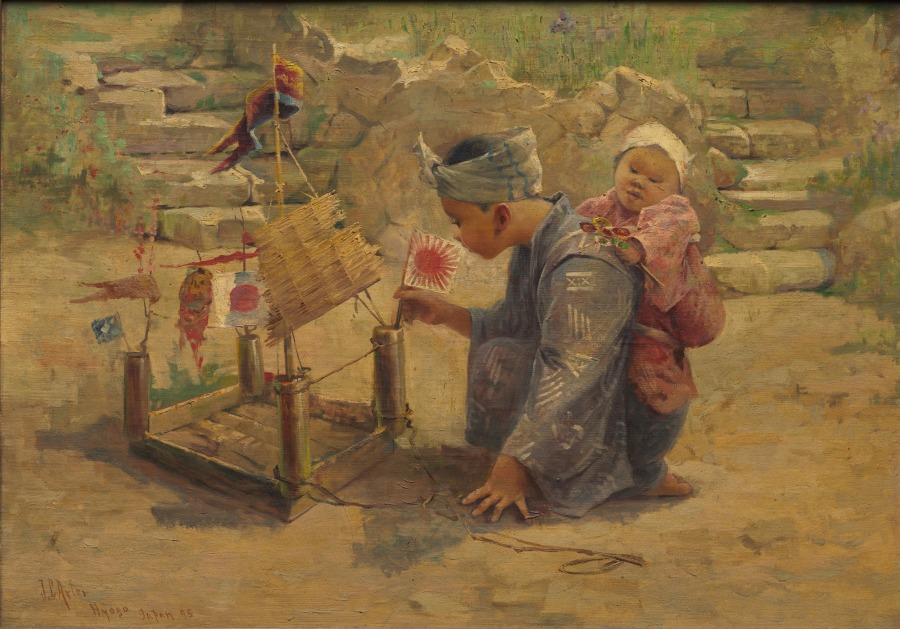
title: Japanese Boy Building a Man-of-War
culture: America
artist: J. C. Arter (American, 1859–1923)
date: 1895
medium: oil on canvas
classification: Painting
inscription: signed lower left: J. C. Arter / Hyozo / Japan 95